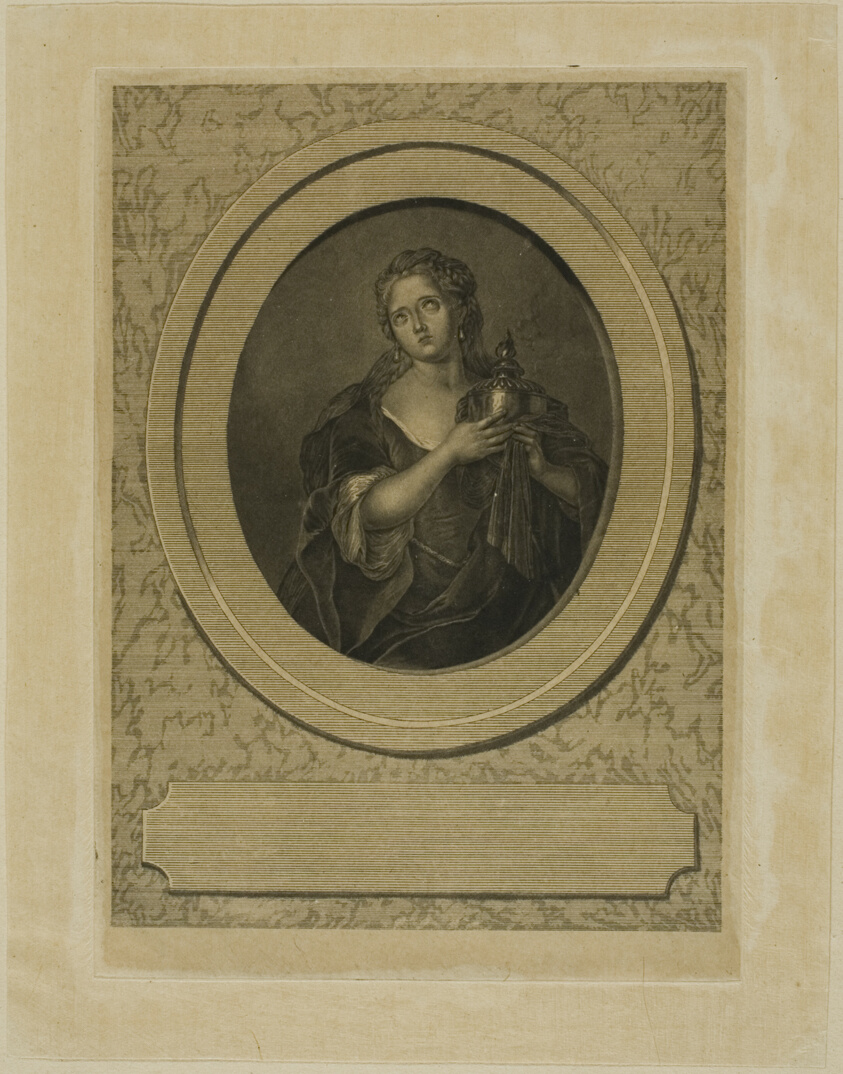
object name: Print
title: Adrienne Lecouvreur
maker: Jean-Baptiste de Grateloup (French, 1735-1817)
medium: Aquatint on paper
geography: France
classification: aquatint; print; prints and drawing